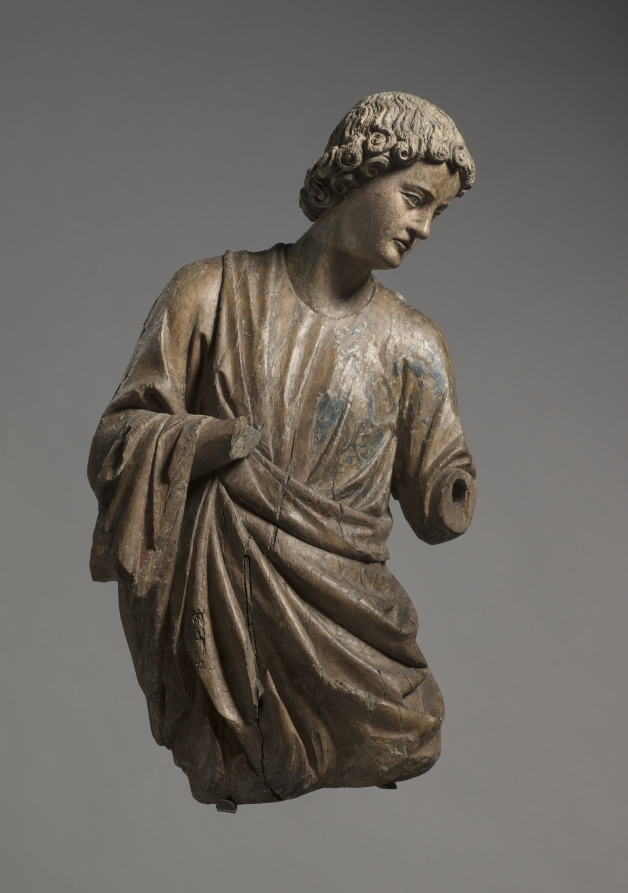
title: Angel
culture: France, vicinity of Reims, 13th century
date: c. 1250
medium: walnut with traces of gilding and polychromy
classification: Sculpture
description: Surviving in fragmentary condition, this pair of angels lacks lower arms, hands, wings, and attributes. Their original paint and gilding, now almost entirely lost, once rendered their garments a rich brocade and their hair a luxuriant gold. Nonetheless, in their graceful poses and sublime faces—which may portray tragic interest, anguish, or deep concern—their original delicacy and power are still evident. They embody the monumental style of 13th-century High Gothic cathedral sculpture in France. Their style specifically suggests they were carved in or around Reims, possibly by sculptors associated with the cathedral there. Their original placement is unknown, but they may have flanked an altar on columns.